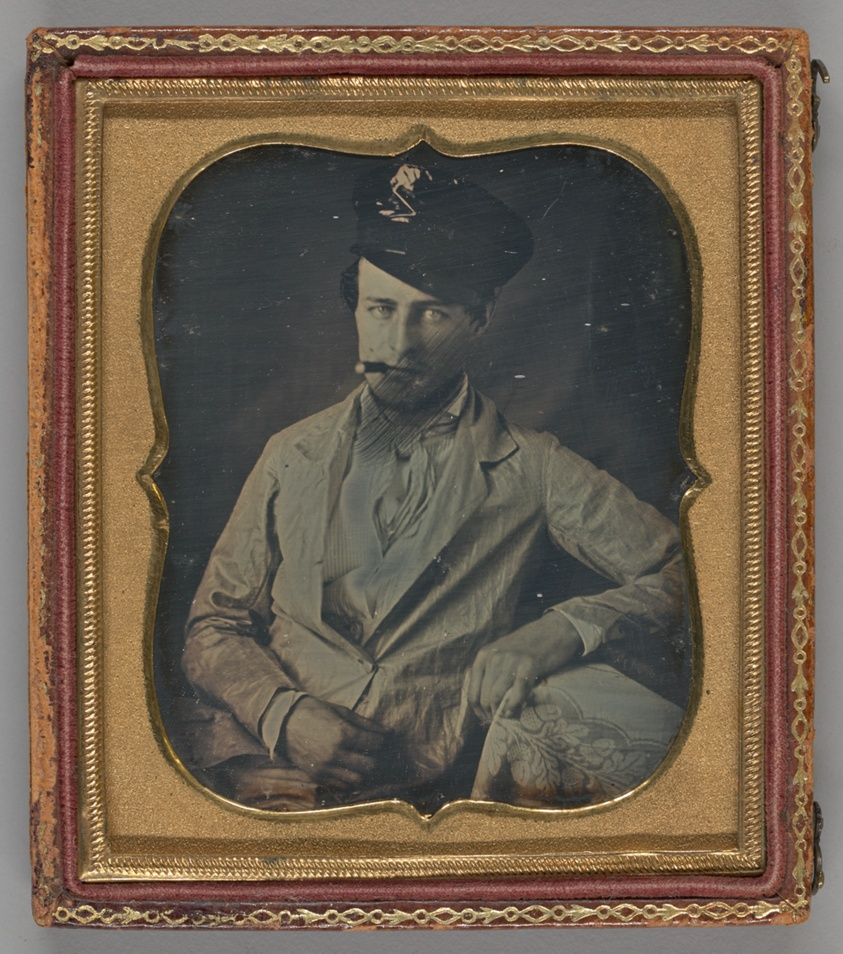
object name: Photograph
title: Untitled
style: 19th century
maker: Artist unknown; 19th century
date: 1839/99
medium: Daguerreotype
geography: Unknown Place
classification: daguerreotype; photographic process; photography; photograph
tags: portraits, portraits: male subject, photography, formal portraits